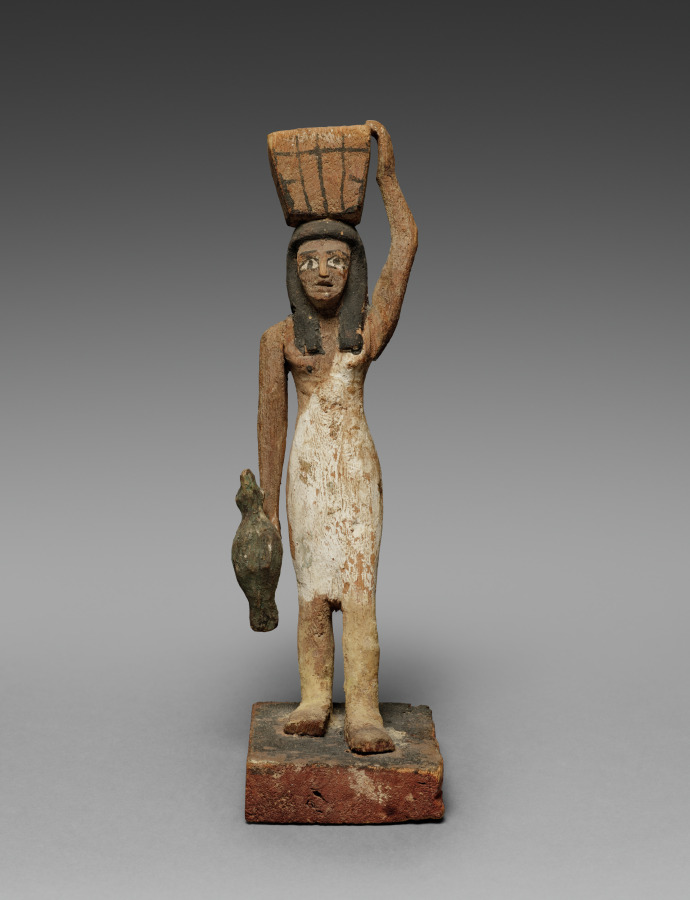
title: Female Offering Bearer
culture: Egypt, Middle Kingdom (2040–1648 BCE), Dynasties 11–12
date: 2000–1801 BCE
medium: painted wood, figure of tamarisk(?), base of sycamore fig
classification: Wood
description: The offering bearer wears a basic wraparound kalasiris dress and a strap that connects to the dress over her left shoulder. It is not known whether straps on ancient Egyptian dresses were designed as a part of the garment or were separate attachments for fashionable or utilitarian purposes. Ancient Egyptian illustrations typically identify women who wore this garment with a strap as servants, whereas artisans depicted men of all socioeconomic levels wearing the version for men.